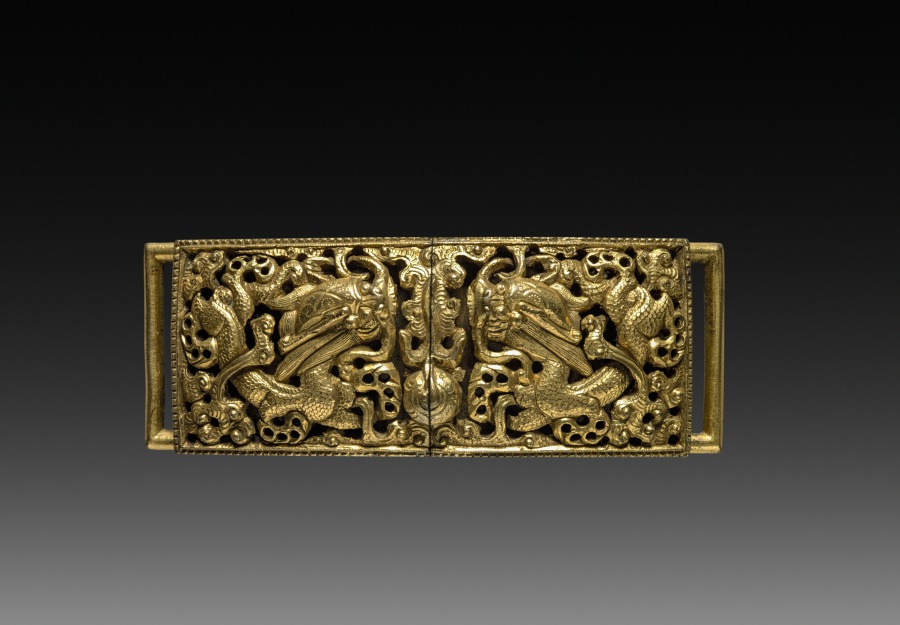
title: Buckle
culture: China, Qing dynasty (1644-1911) or Republican period (1912-49)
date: 1900s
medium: brass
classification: Jewelry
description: Each half of the buckle is decorated with a perforated dragon design.